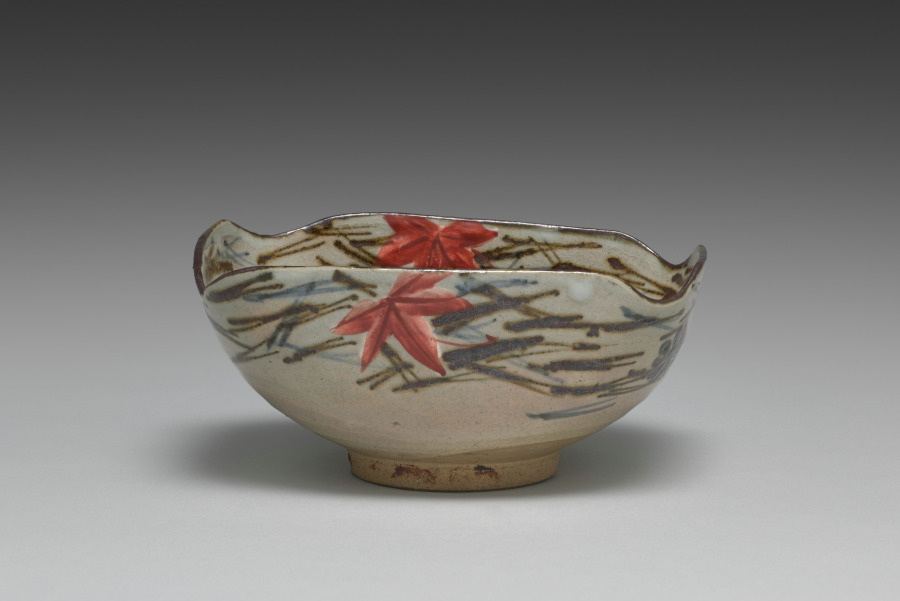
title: Nesting Dish with Scattered Pine Needles and Maple Leaves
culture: Japan, Edo period (1615–1868)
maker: Seifū Yohei I (Japanese, 1801–1861)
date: 1861–78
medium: One of a pair of side dishes; stoneware with underglaze blue and iron oxide, white slip, and overglaze color enamel (Kyoto ware)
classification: Ceramic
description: Seifū Yohei I made both blue and white porcelains after Ming dynasty (1368–1644) Chinese wares fired in the kilns at Jingdezhen for export. He also made colorful stoneware in the style of his teacher, Nin’ami Dōhachi (Takahashi Dōhachi II) (1783–1855).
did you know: The smaller dish is stamped with one of Yohei I’s seals.